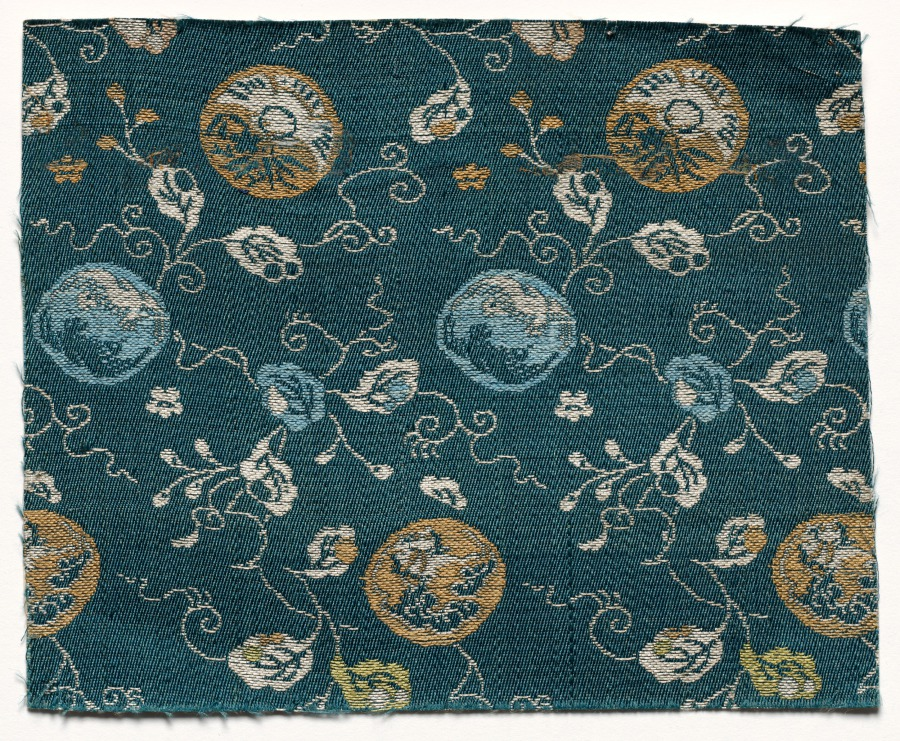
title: Fragment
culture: Japan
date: 1800s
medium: silk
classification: Textile